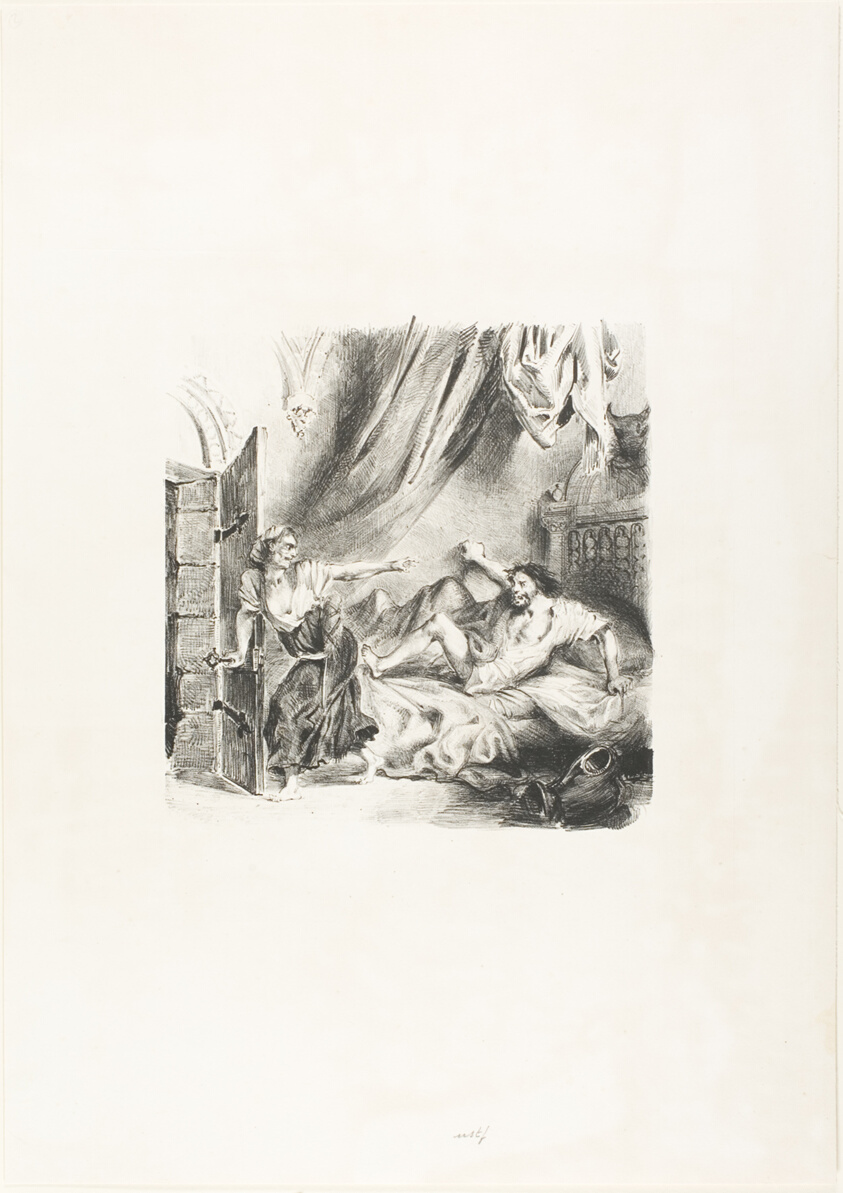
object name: Print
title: Fronte-boeuf and the Witch, from Ivanhoe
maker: Eugène Delacroix (French, 1798-1863)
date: 1829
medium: Lithograph in black on white wove paper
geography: France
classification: lithograph; print; prints and drawing